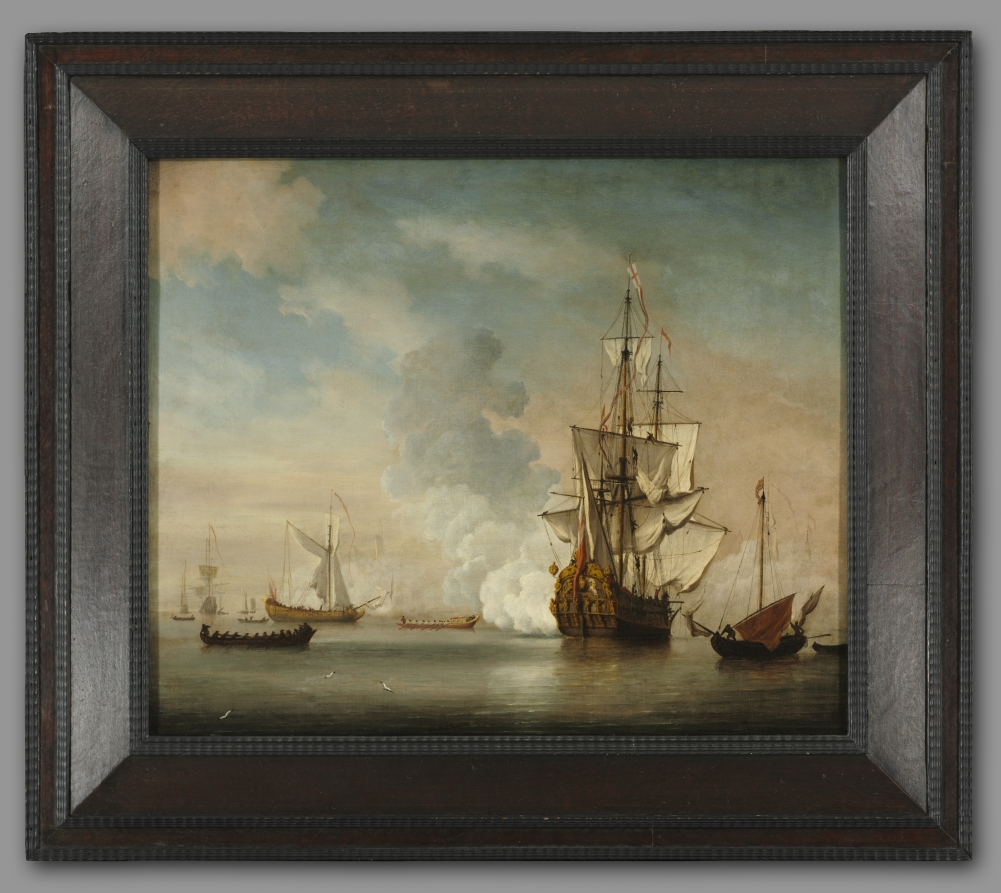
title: English Warship Firing a Salute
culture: Netherlands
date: 1690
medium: oil on canvas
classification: Painting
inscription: Front, lower center near edge, signed and dated in paint Reverse: top stretcher, stencil "360 V"; hand written in pencil "Left"; hand written in pencil (red) "18"; Vertical center bar: Label with hand written pencil "K.L Patterson"; hand written pencil " #5"; Signed lower center: "W. V. Velde J. 1690"; horizontal center bar: hand written w/grease pencil "10120".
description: Van de Velde and his father picked up their lives in Amsterdam in 1672 and moved to England to paint for the king. Their paintings of the Royal Navy’s massive ships celebrated England’s power in war and trade.